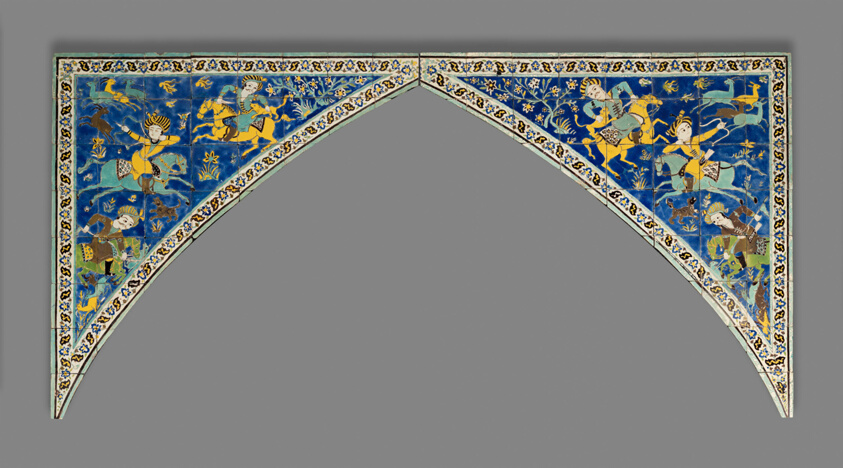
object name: Architectural fragment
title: Spandrel with a Hunting Scene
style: Islamic (culture or style)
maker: Iran; Isfahan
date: Safavid dynasty (1501–1722), Mid 17th century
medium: Fritware with polychrome overglaze decoration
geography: Iran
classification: architectural fragment; asian art; decorative arts